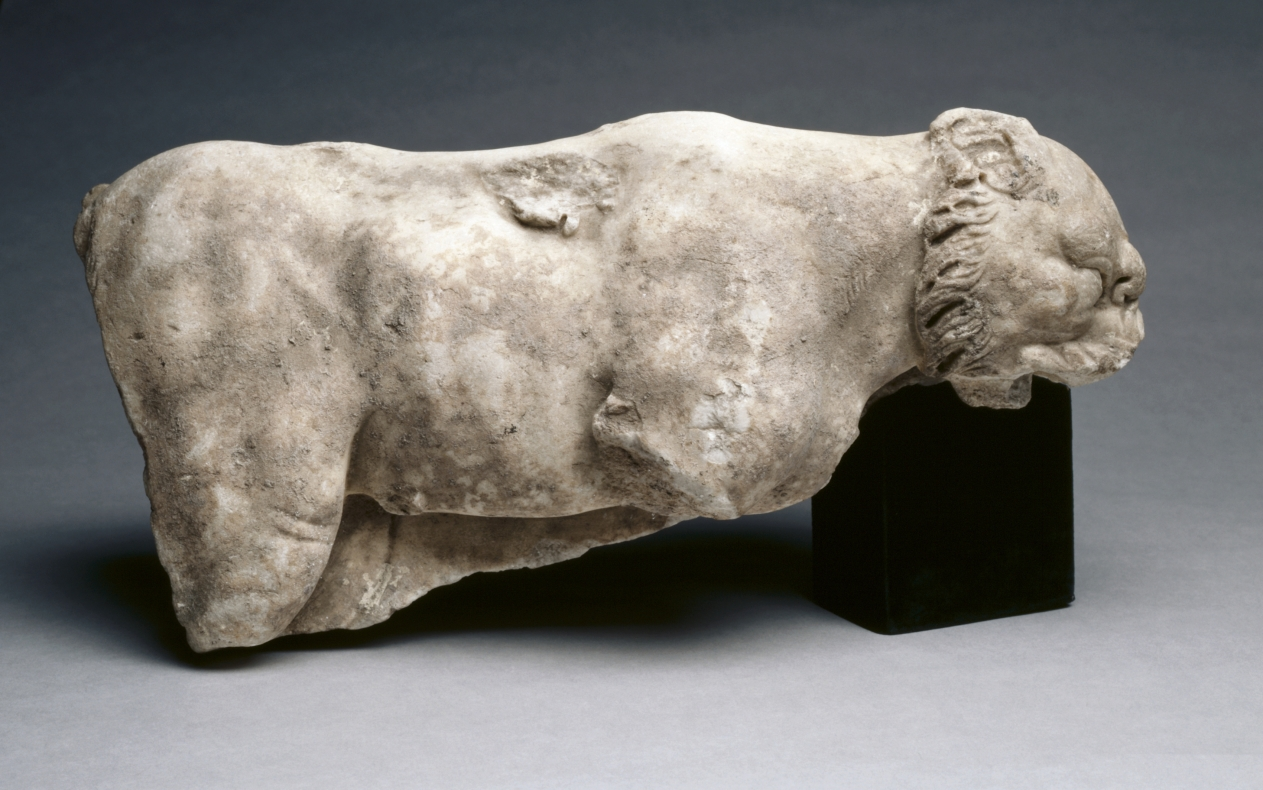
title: Fragment of a Panther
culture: Greece, Hellenistic period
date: 100s BCE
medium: marble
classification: Sculpture